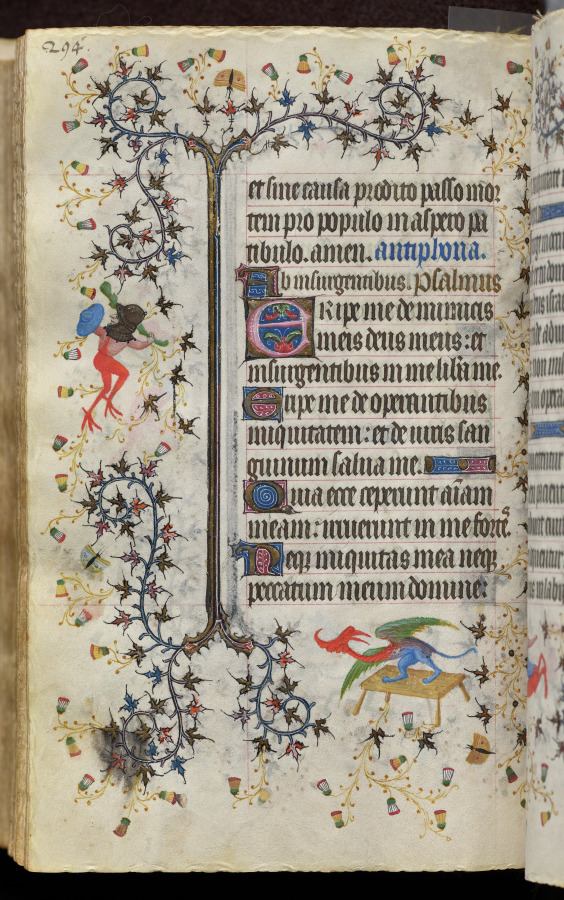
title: Hours of Charles the Noble, King of Navarre (1361-1425): fol. 147v. Text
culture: France, Paris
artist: Master of the Brussels Initials and Associates (French)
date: c. 1405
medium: ink, tempera, and gold on vellum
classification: Bound Volume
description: This precious volume was obviously highly prized by its owner, the French-born King of Navarre, who had his coat of arms painted on no less than twenty folios. Rather than directly commissioning this manuscript from a specific workshop, it seems that Charles the Noble acquired his book of hours -- perhaps ready-made for the luxury market -- while on a trip to Paris in 1404-05. A collaborative effort, six painting styles are evidenced within the pages of this codex, those of two Italians, two Frenchmen, and two Netherlanders. The painter who was responsible for the planning and decoration of the book, and who produced seventeen of the large miniatures, was a Bolognese artist known as the Master of the Brussels Initials. His principal assistant, responsible for most of the borders, was a Florentine who signed his name "Zecho" da Firenze on folio 208 verso.